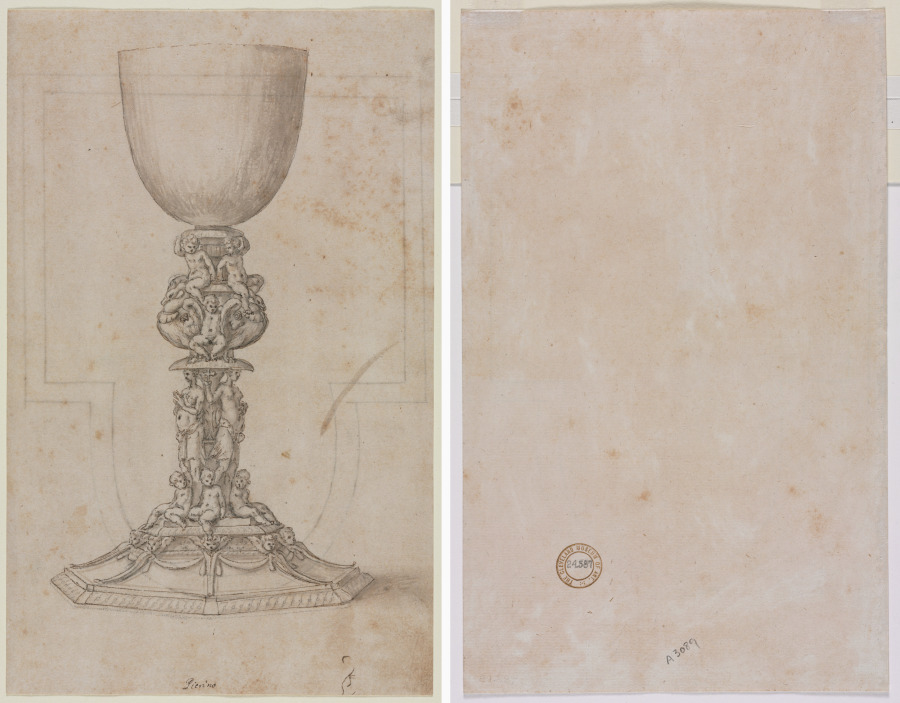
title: Design for a Chalice (recto) Architectural Plan (verso)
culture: Italy, 16th century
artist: Luzio Romano (Italian, active 1528–75)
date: mid-1500s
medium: pen and brown ink and brush and brown wash over black chalk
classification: Drawing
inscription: lower center, in brown ink: Pierino ; VERSO OF SECONDARY SUPPORT, lower center, in graphite: A 3089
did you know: The voluptuous women supporting surrounding the lower stem of this chalice were likely inspired by caryatids--sculpted female figures used as weight bearing columns in classical architecture.